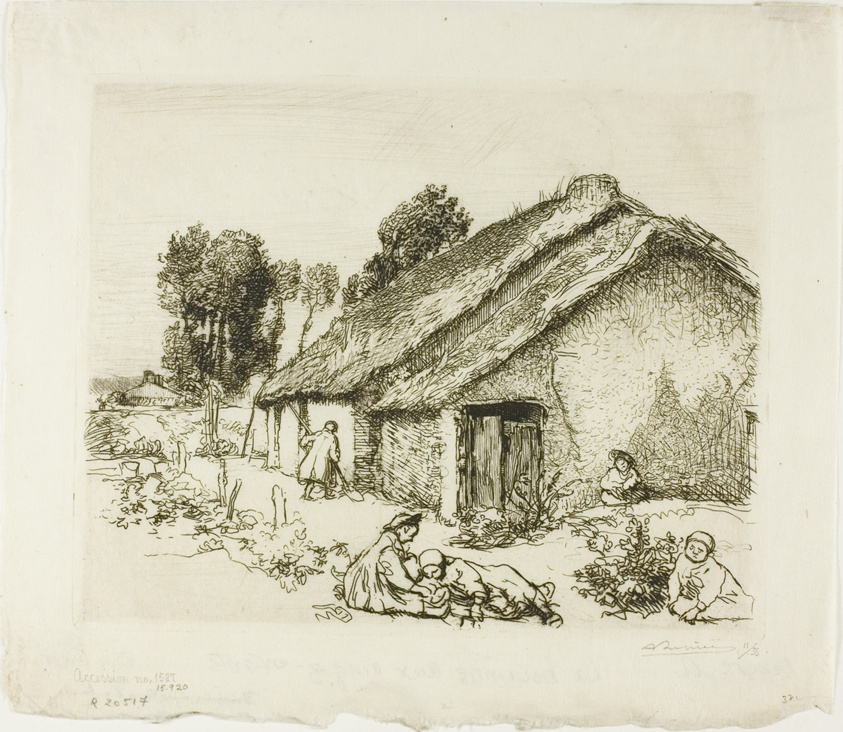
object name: Print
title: Cottage with Five Children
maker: Louis Auguste Lepère (French, 1849-1918)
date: 1911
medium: Etching on cream laid Japanese paper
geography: France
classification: etching; print; prints and drawing